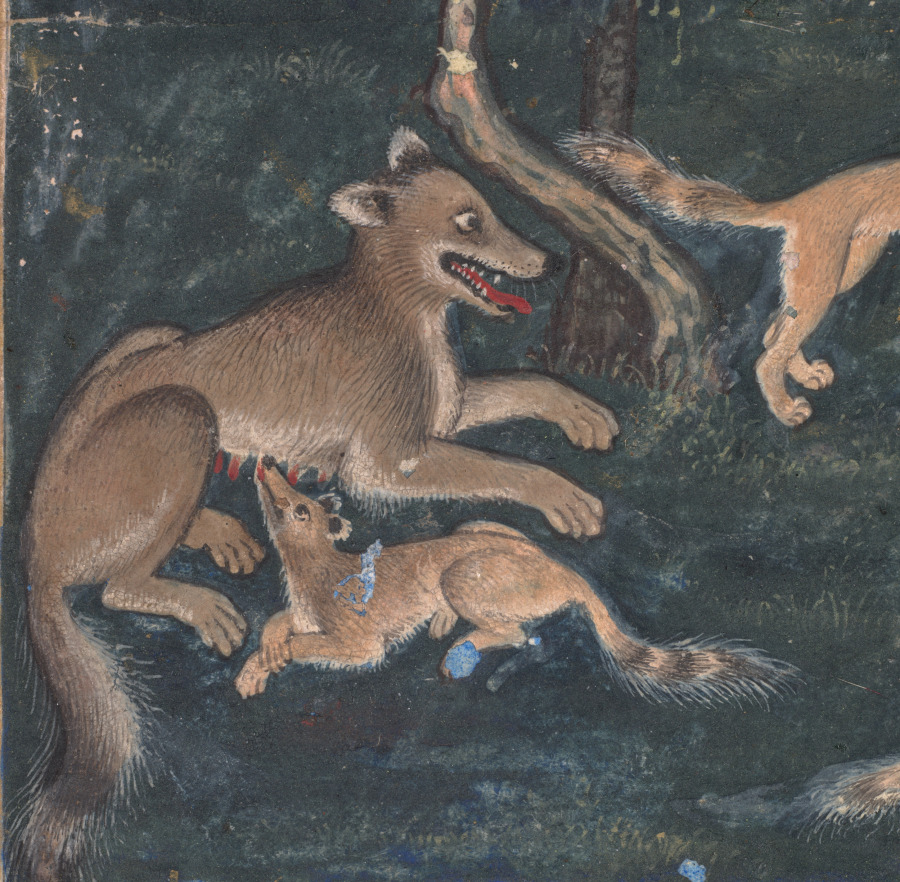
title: The parrot mother cautions her young on the danger of playing with foxes, from a Tuti-nama (Tales of a Parrot): Fifth Night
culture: Mughal India, court of Akbar (reigned 1556–1605)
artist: Dasavanta (Indian, d. 1584)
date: c. 1560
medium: gum tempera, ink, and gold on paper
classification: Painting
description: One night the parrot Tuti tells Khujasta that he hopes her relationship with her new lover does not wind up being only half-baked, like the medical treatment of the king of Kamarupa. She asks what that was about, and Tuti begins the story by telling of a mother parrot who lived in the forest with her young, who liked to play with the fox cubs who lived at the base of the tree. The mother parrot is perched on the edge of her treetop nest.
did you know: A fox cub suckles contentedly, as the mother keeps a sharp eye on the others.